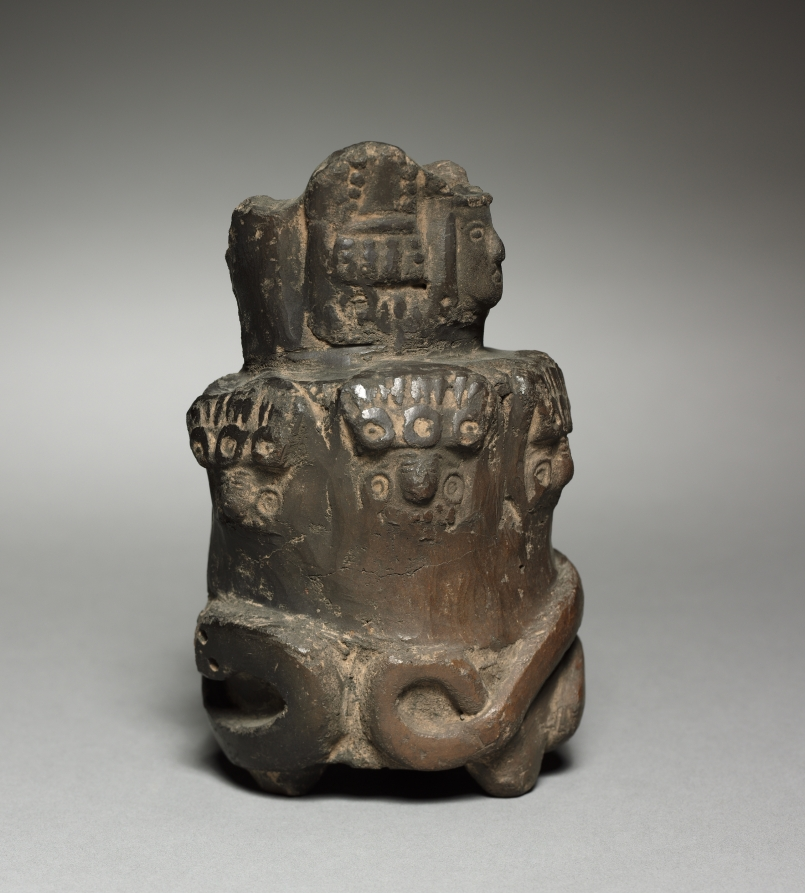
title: Vase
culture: Peru, Tiwanaku style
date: 800–200 BCE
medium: pottery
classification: Ceramic